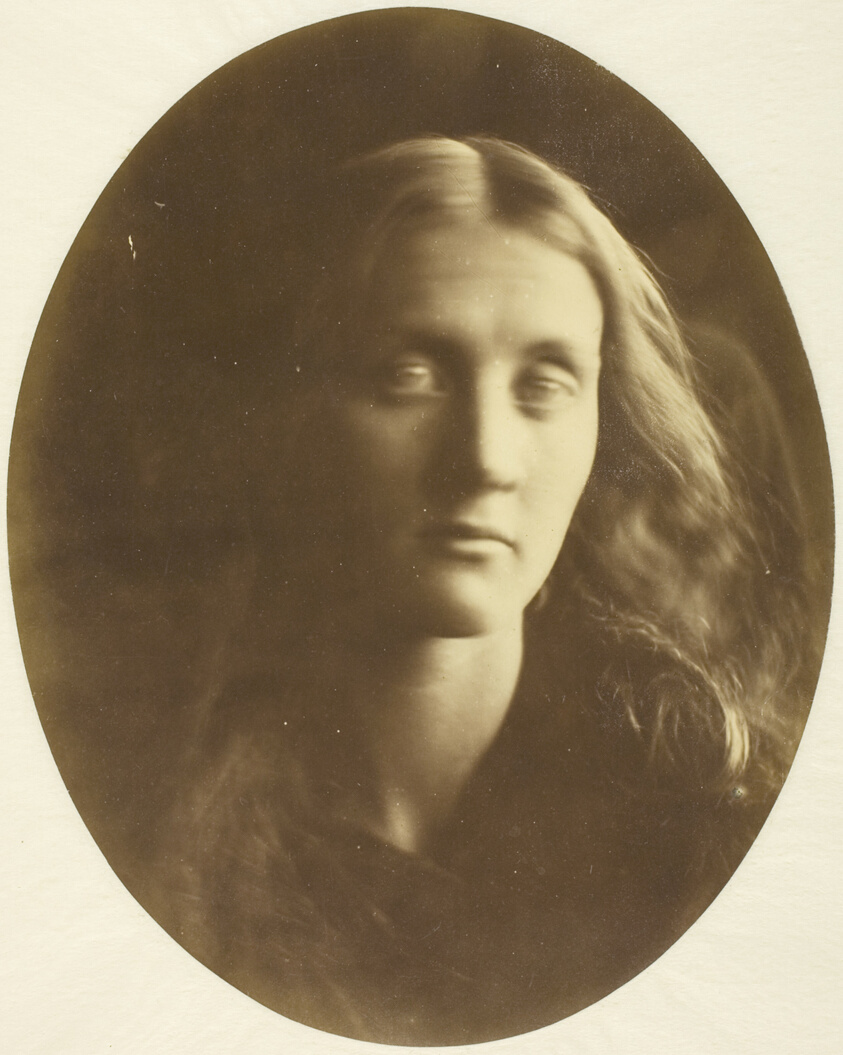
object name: Photograph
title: Julia Jackson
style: 19th century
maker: Julia Margaret Cameron (English, 1815–1879)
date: April 1867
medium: Albumen print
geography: England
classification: albumen silver print; photographic process; photography; photograph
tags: portraits, portraits: female subject, photography